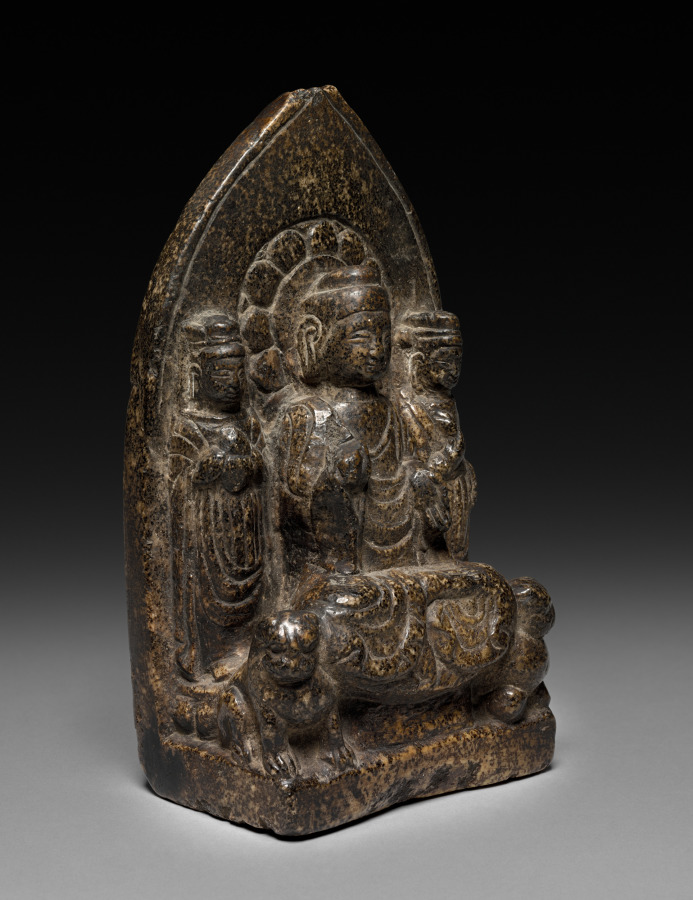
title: Buddha Triad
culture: China, Northern Dynasties period (386–581 CE), Northern Zhou (557-581)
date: 568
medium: stone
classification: Sculpture